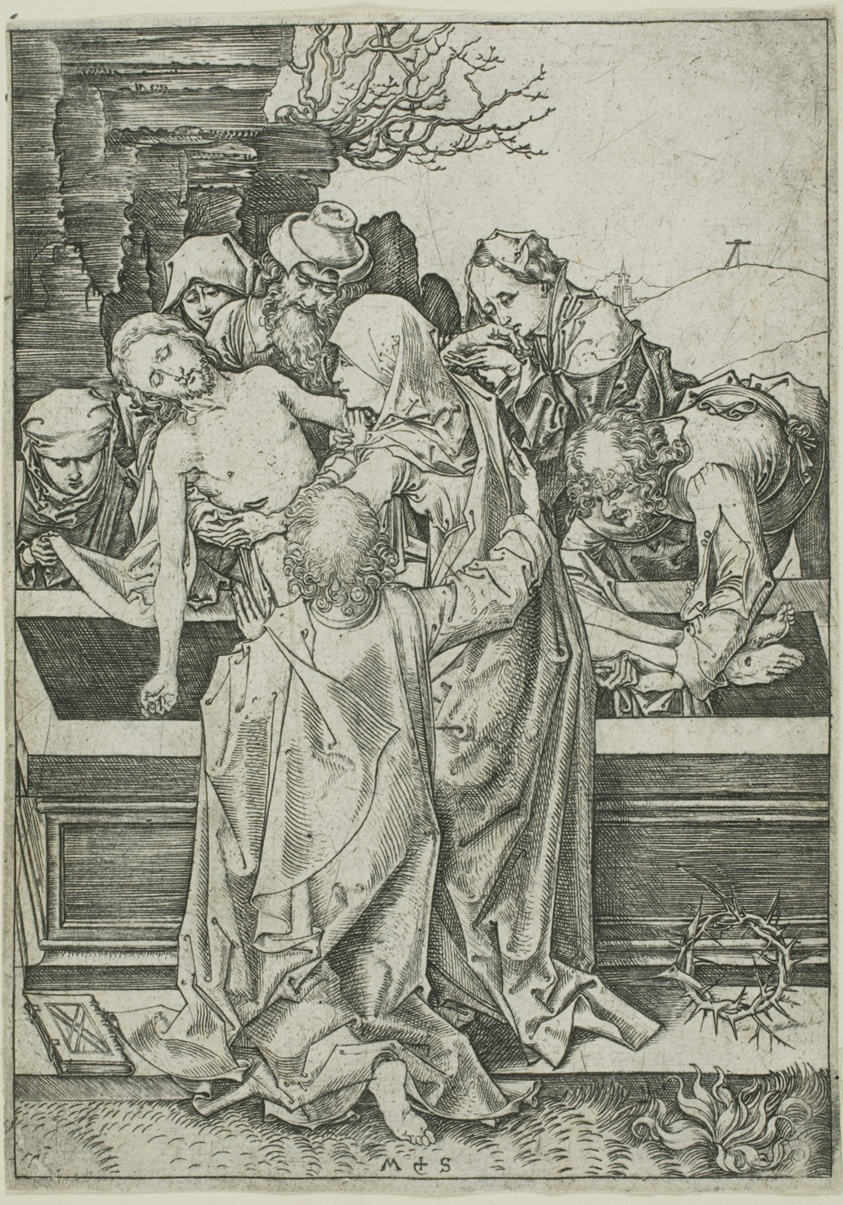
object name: Print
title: The Entombment, from The Passion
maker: Martin Schongauer (German, c. 1430/50-1491)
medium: Engraving on paper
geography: Germany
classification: engraving; print; prints and drawing